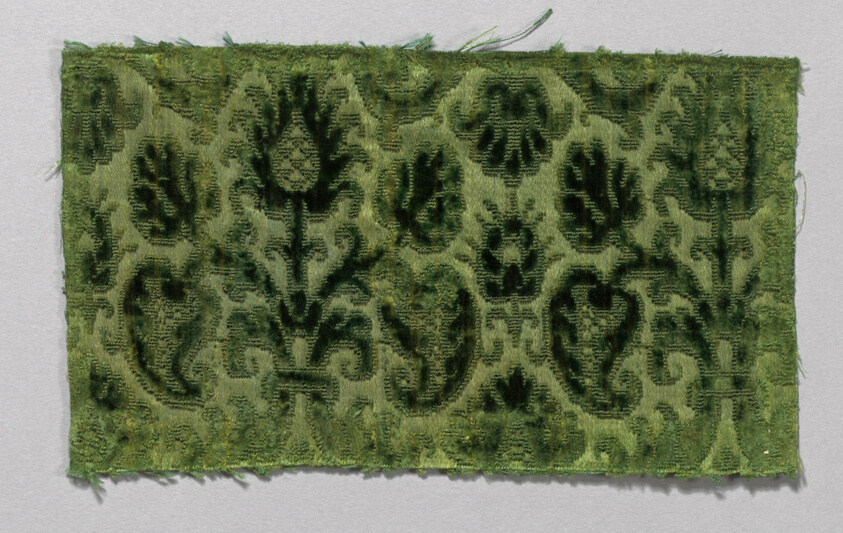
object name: Textile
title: Fragment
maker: Italy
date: 1601/25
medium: Silk, cut, uncut, and voided velvet against satin weave foundation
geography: Italy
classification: textile; weaving - velvet